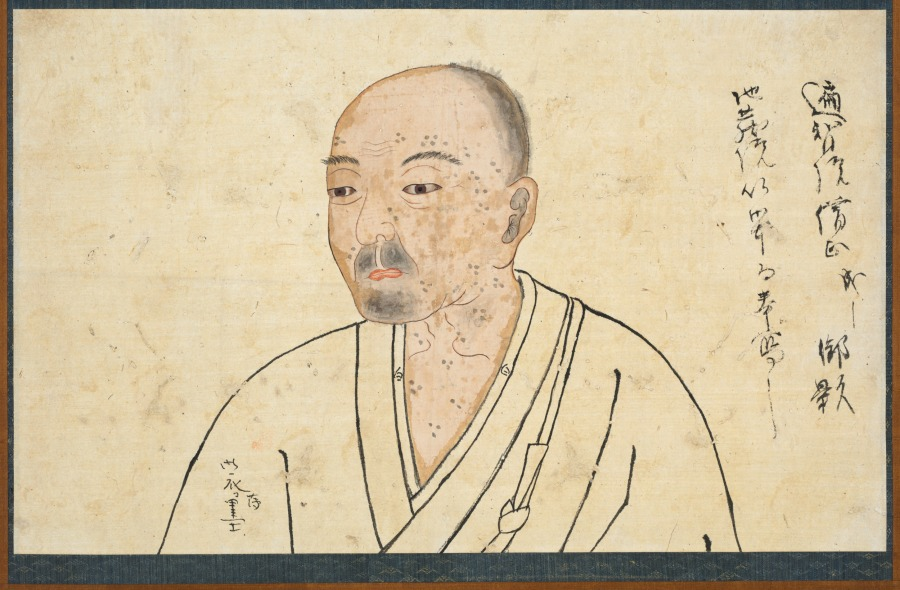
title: Portrait Study of Seigen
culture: Japan, Kamakura period (1185–1333)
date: 1300s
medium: hanging scroll; ink and slight color on paper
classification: Painting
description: This is a portrait study of the monk Seigen (1162–1231). The inscription identifies him and notes that the study is after a portrait in the subtemple Jizō’in at Daigoji. The artist included scars from an illness, and made notations about the colors the clothing should be. Seigen was abbot of Daigoji, one of the most influential Esoteric Buddhist temples in Japanese history.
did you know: The blotches on the monk's face may have been caused by smallpox.